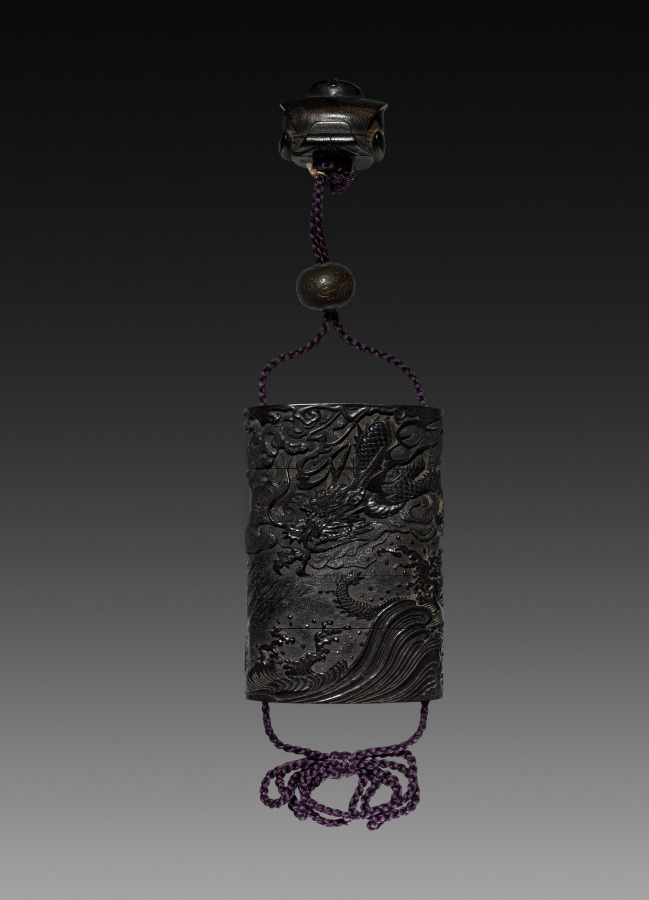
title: Inro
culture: Japan, Edo period (1615–1868)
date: 1615–1868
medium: lacquer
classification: Lacquer